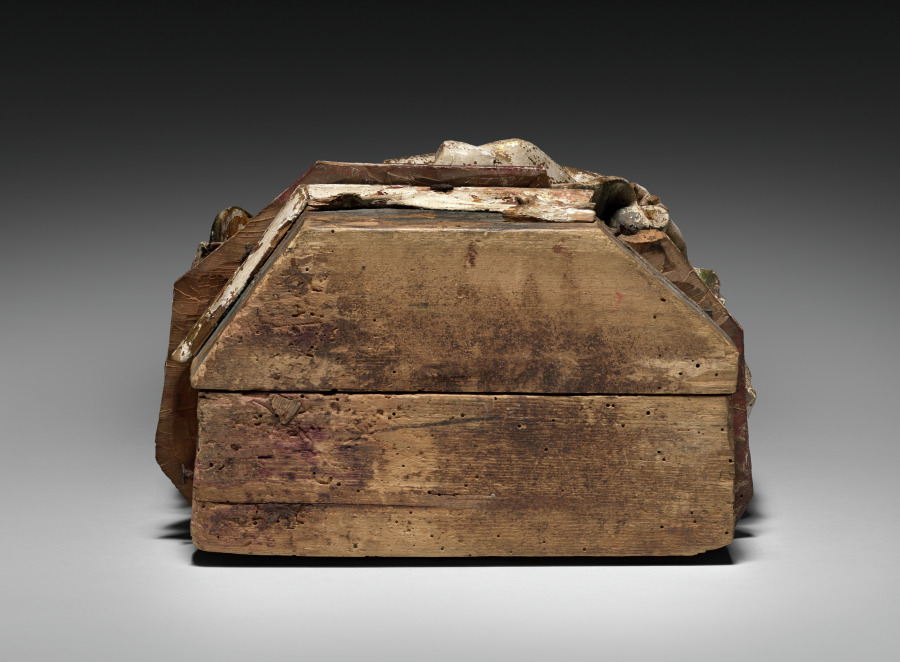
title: Female Bust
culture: Austria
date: c. 1470–1500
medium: Painted and gilded lindenwood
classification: Sculpture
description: This female bust is part of a series of three in the museum's collection. The identity of the figures has been speculated by scholars but without resolution. Because this and the other female busts in the series do not retain their attributes, it is difficult to know their original purpose. It is possible that they may have once formed a group of female saints from the predella of a large altarpiece. Since the sculpture is not carved in the round, this hypothesis has merit. Another recent proposal is that this and the other sculptures may be from a series of female busts representing the wise and foolish virgins referenced in Matthew 25:1-13, a parable by Jesus admonishing listeners to be spiritually prepared.